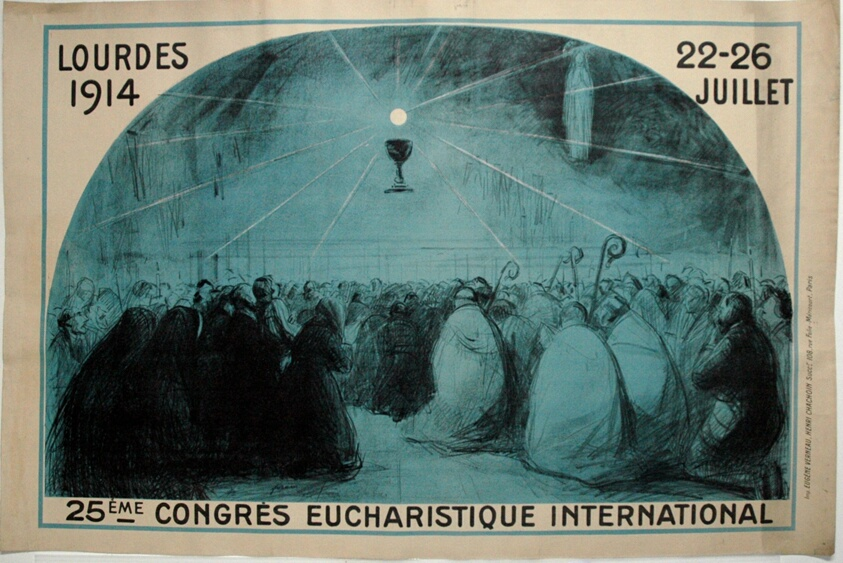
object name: Print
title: Lourdes, 1914, 25th International Eucharistic Congress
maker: Jean Louis Forain (French, 1852-1931; Printed by Eugene Verneau & Henri Chachoin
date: 1914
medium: Color lithograph on cream wove paper laid down on linen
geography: France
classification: lithograph; print; prints and drawing